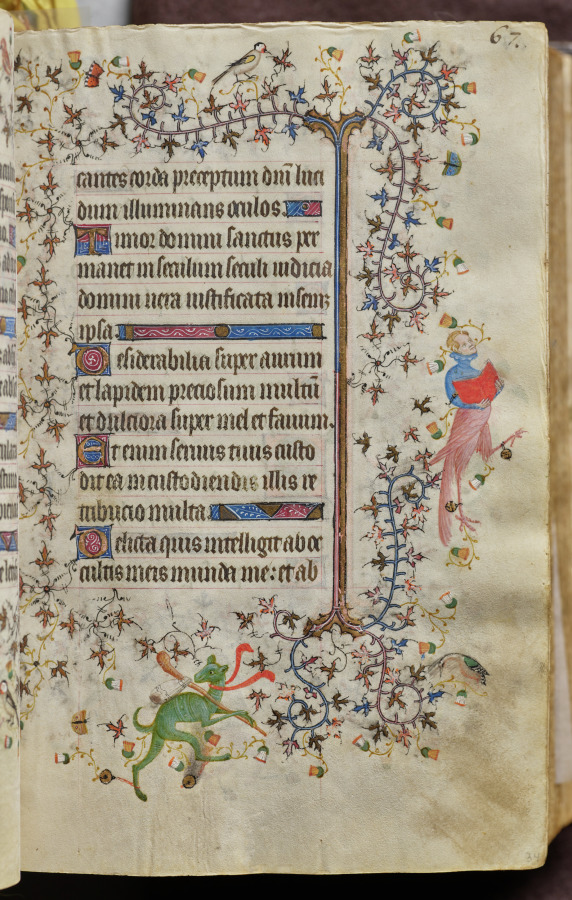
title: Hours of Charles the Noble, King of Navarre (1361-1425): fol. 34r, Text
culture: France, Paris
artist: Master of the Brussels Initials and Associates (French)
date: c. 1405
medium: ink, tempera, and gold on vellum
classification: Bound Volume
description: This precious volume was obviously highly prized by its owner, the French-born King of Navarre, who had his coat of arms painted on no less than twenty folios. Rather than directly commissioning this manuscript from a specific workshop, it seems that Charles the Noble acquired his book of hours -- perhaps ready-made for the luxury market -- while on a trip to Paris in 1404-05. A collaborative effort, six painting styles are evidenced within the pages of this codex, those of two Italians, two Frenchmen, and two Netherlanders. The painter who was responsible for the planning and decoration of the book, and who produced seventeen of the large miniatures, was a Bolognese artist known as the Master of the Brussels Initials. His principal assistant, responsible for most of the borders, was a Florentine who signed his name "Zecho" da Firenze on folio 208 verso.